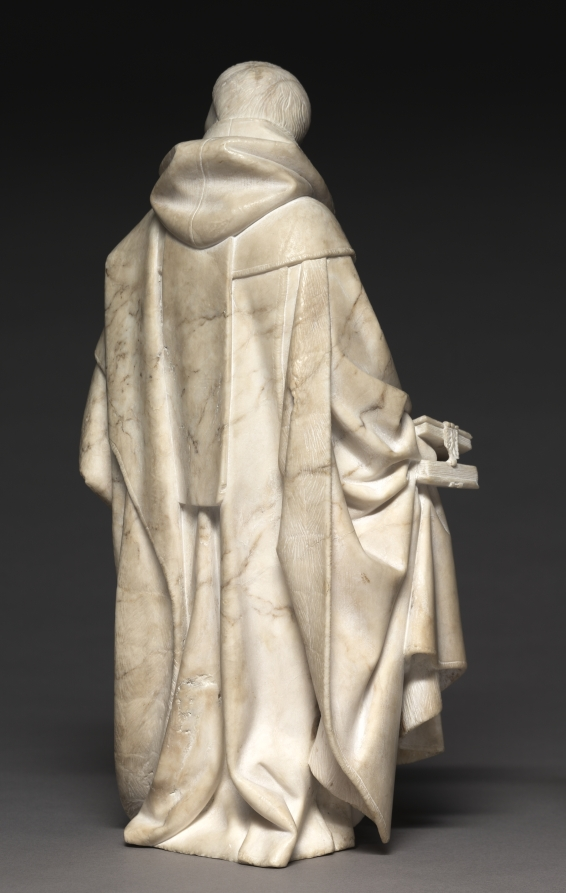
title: Mourner from the Tomb of John the Fearless and Margaret of Bavaria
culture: Spanish, Burgundy, Dijon, 15th century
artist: Jean de la Huerta (Spanish, active Burgundy, 1431–62)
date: 1443–45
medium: salins alabaster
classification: Sculpture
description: This monklike figure has a variously textured monochrome surface. Alabaster’s softness made it easy to carve details like the fabric and fur of the mourner’s robe and the codex pages in his hand. This is one of 40 mourners from an elaborate funeral procession beneath an intricately carved alabaster arcade. This mourner comes from the monastery of Champmol near Dijon, which became a primary burial place for Burgundian dukes. The sculpture was part of the tomb of John the Fearless (1371–1419), commissioned by his son Philip the Good (1396–1467), modeled after the earlier monument for Philip the Bold.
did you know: A plaster cast of this mourner adorns the Tomb of John the Fearless and Margaret of Bavaria in Dijon, France.